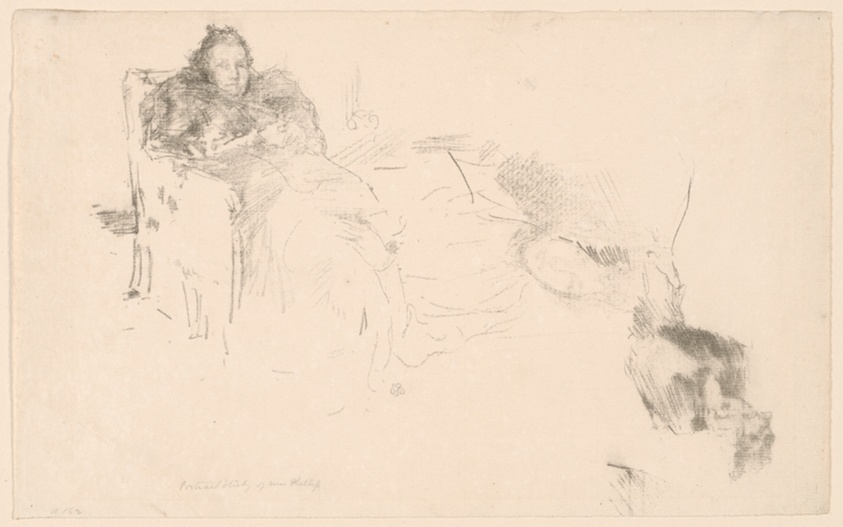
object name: Print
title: Portrait Study: Mrs. Philip, No. 4 [Studies of the Philips]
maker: James McNeill Whistler (American, 1834-1903)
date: 1897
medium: Transfer lithograph in black, printed over counterproof of lithograph in black, on ivory laid paper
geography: United States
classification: transfer lithograph; lithograph; print; prints and drawing; paper